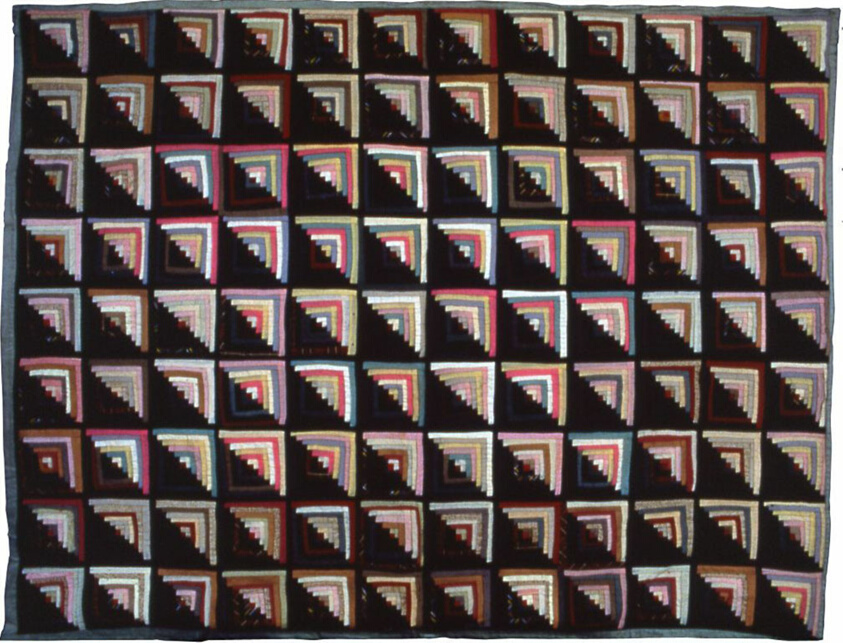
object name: Textile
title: Bedcover (Log Cabin Quilt)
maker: United States, Illinois, La Salle County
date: Late 1880s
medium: Wool and cotton, pieced; plain weaves; plain weave with supplementary patterning wefts; printed; plain weave with supplementary pile warps forming cut, solid velvet; plain weave self-patterned by ground weft floats; edged and backed with cotton, satin weave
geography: Illinois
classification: textile; needlework - quilt